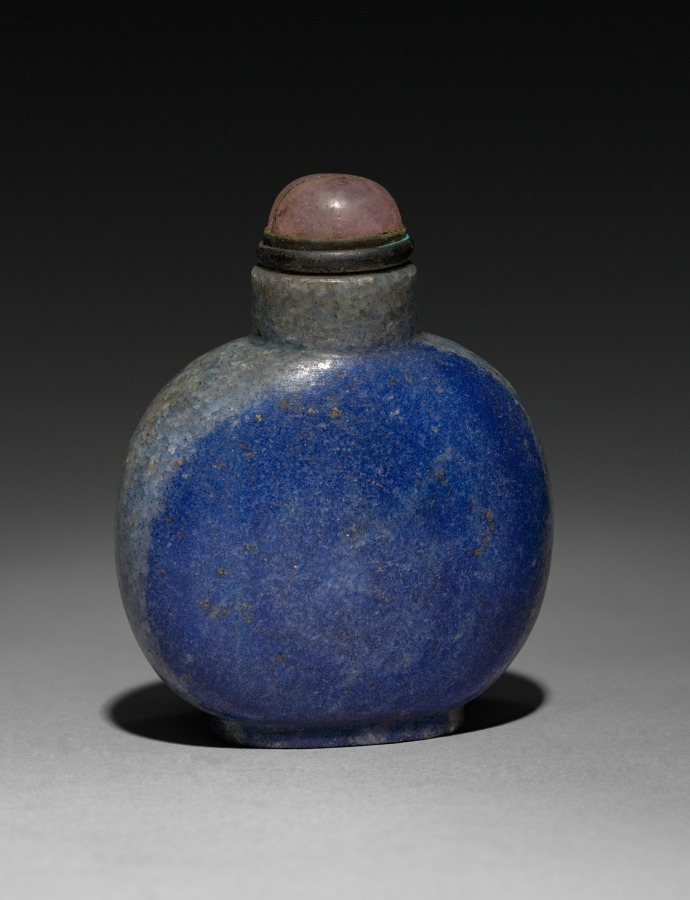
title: Snuff Bottle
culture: China, Qing dynasty (1644-1911)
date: 1644–1911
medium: glass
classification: Glass